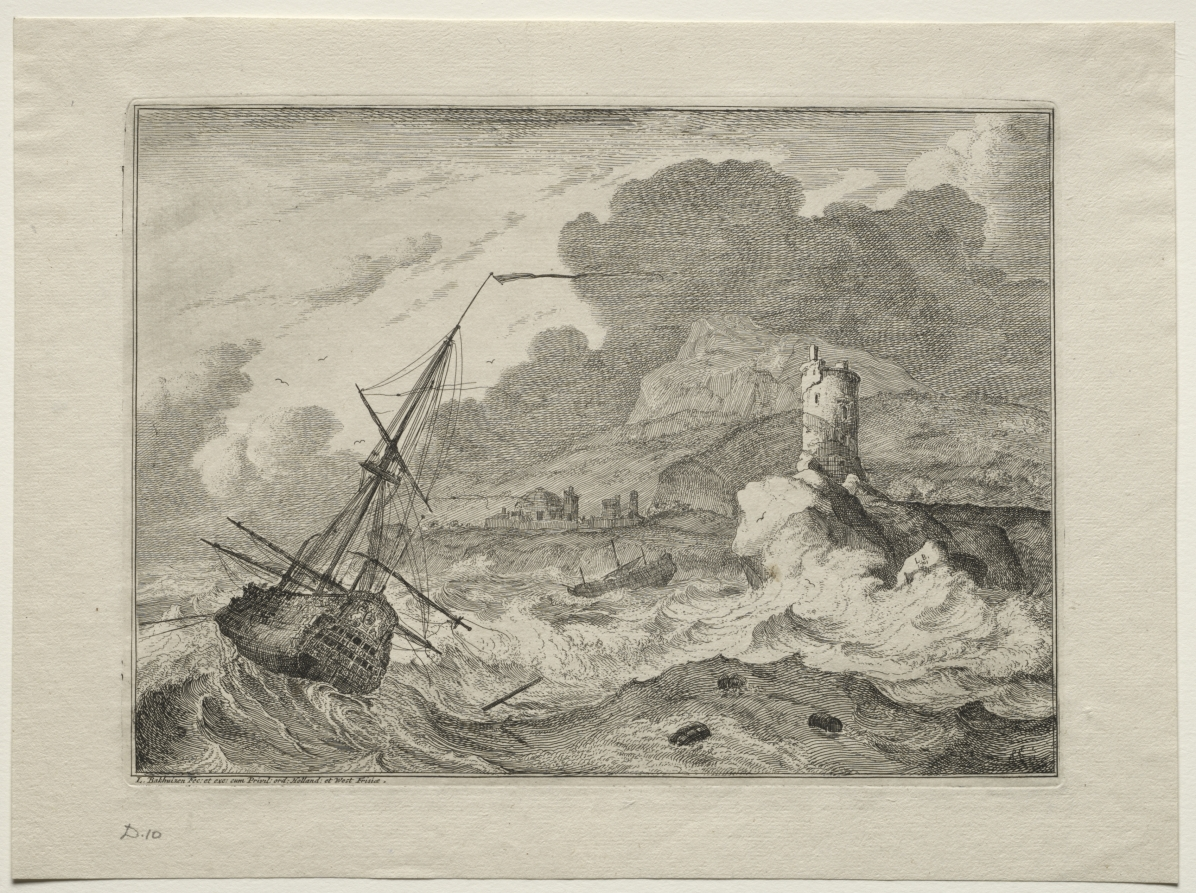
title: Storm at Sea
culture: Netherlands, early 18th century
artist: Ludolf Backhuysen (Dutch, 1631–1708)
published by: Ludolf Backhuysen (Dutch, 1631–1708)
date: 1701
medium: etching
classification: Portfolio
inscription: lower left, in plate: L. Bakhuizen Fec: et exc: cum Privil: ord: Holland: et West Frisiæ. ; lower right, on rock, in plate: L.B. / 1701 ; lower left, in graphite: D.10